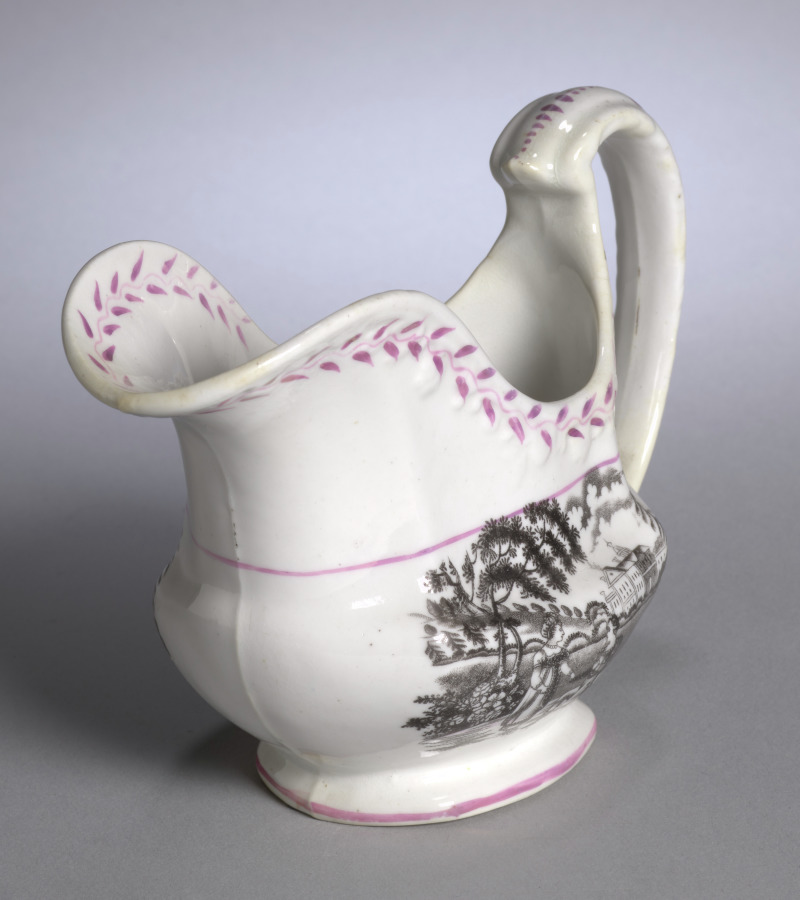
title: Cream Pitcher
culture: England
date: c. 1800–1825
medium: earthenware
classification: Ceramic